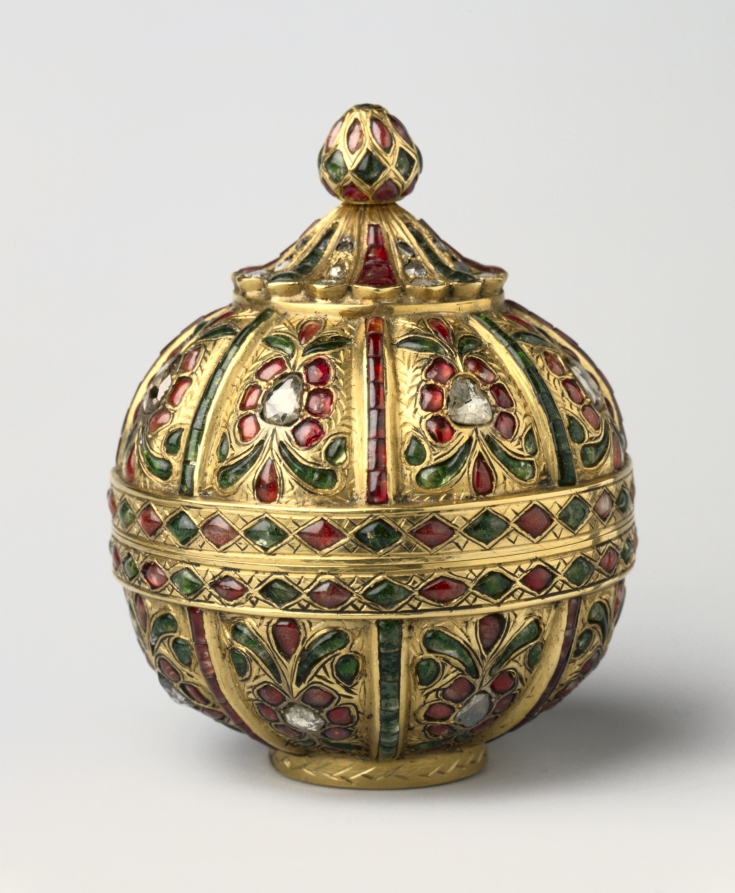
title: Globular-Shaped Box Decorated with Gems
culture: India, Mughal dynasty (1526-1756)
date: 1700s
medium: gold paste and clear and colored rock crystal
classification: Metalwork